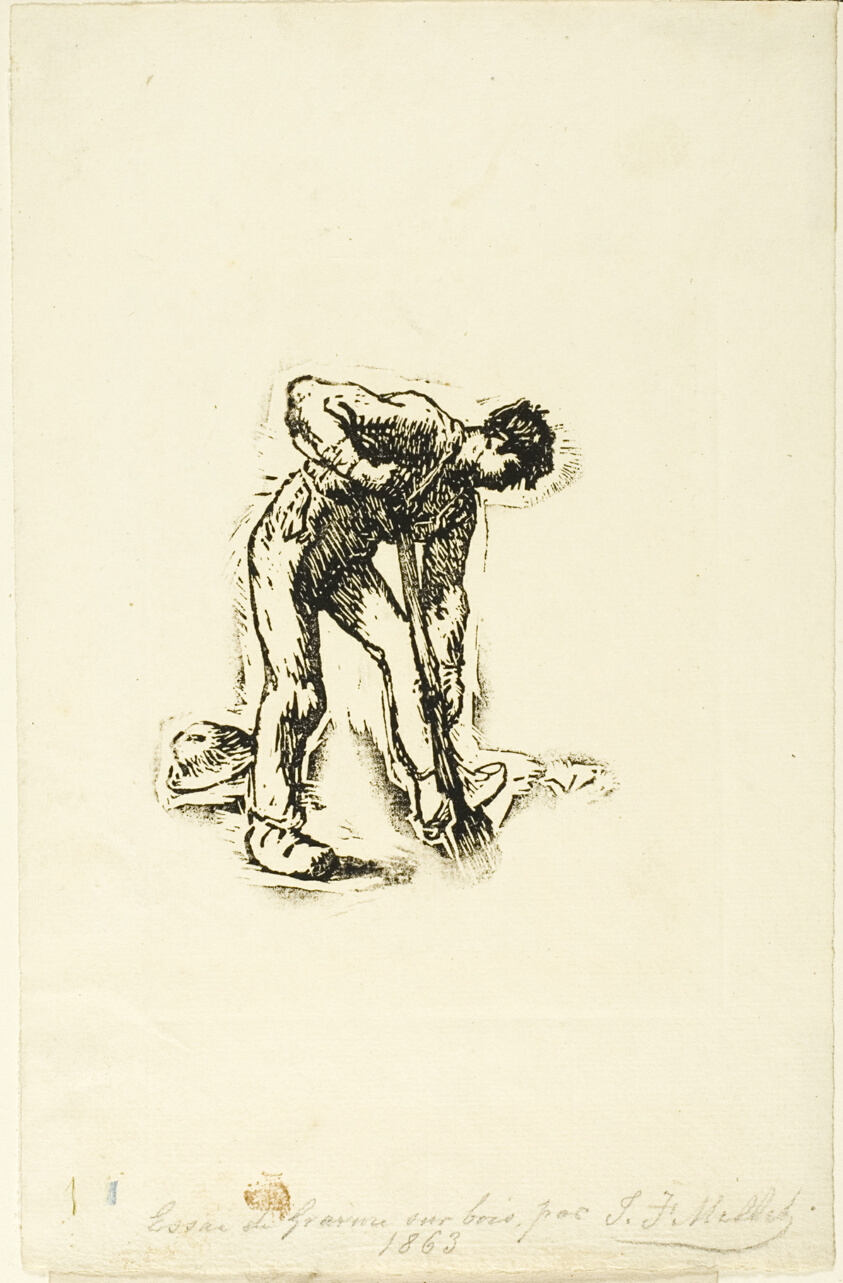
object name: Print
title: Peasant Digging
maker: Jean François Millet (French, 1814-1875)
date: 1863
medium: Woodcut from a partially inked block on ivory laid paper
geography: France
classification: woodcut; print; prints and drawing